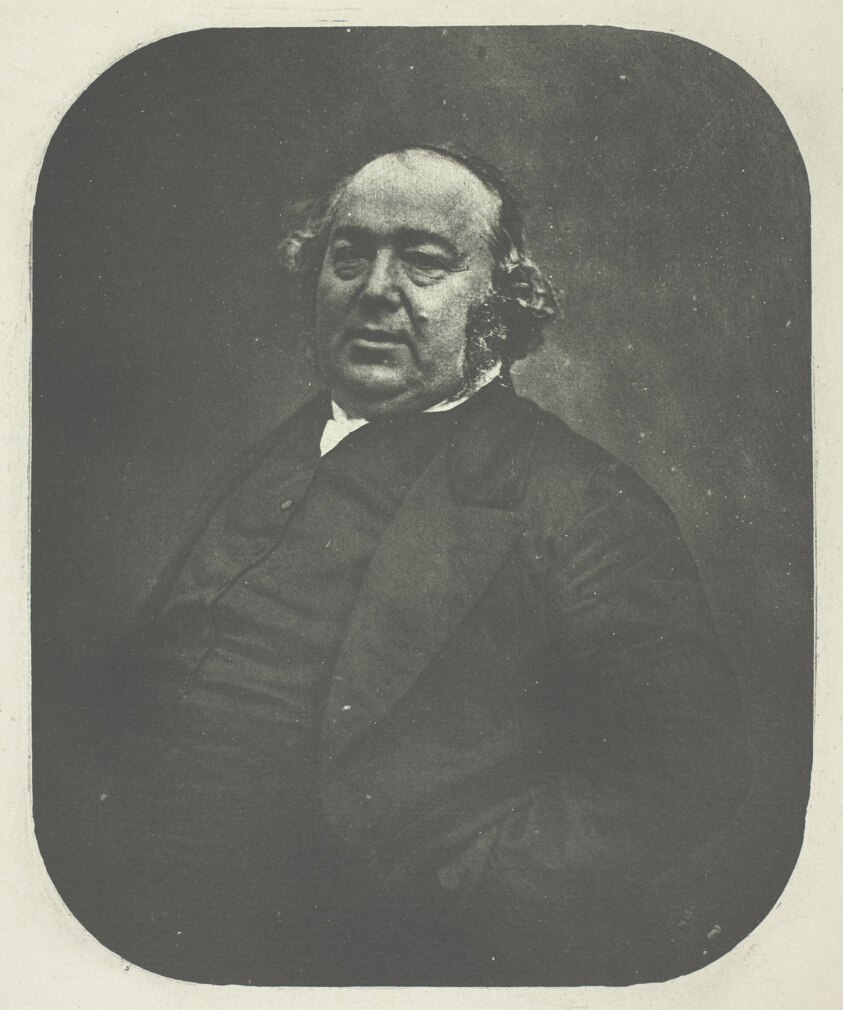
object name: Photograph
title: Portrait de Jules Janin d'Apres Nadar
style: 19th century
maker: Charles Nègre (French, 1820–1880)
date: c. 1857, printed 1982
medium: Photogravure, from the portfolio Charles Negre: Treize Heliogravures, 1854–1857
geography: France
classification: photogravure; photomechanical process; photography; photograph